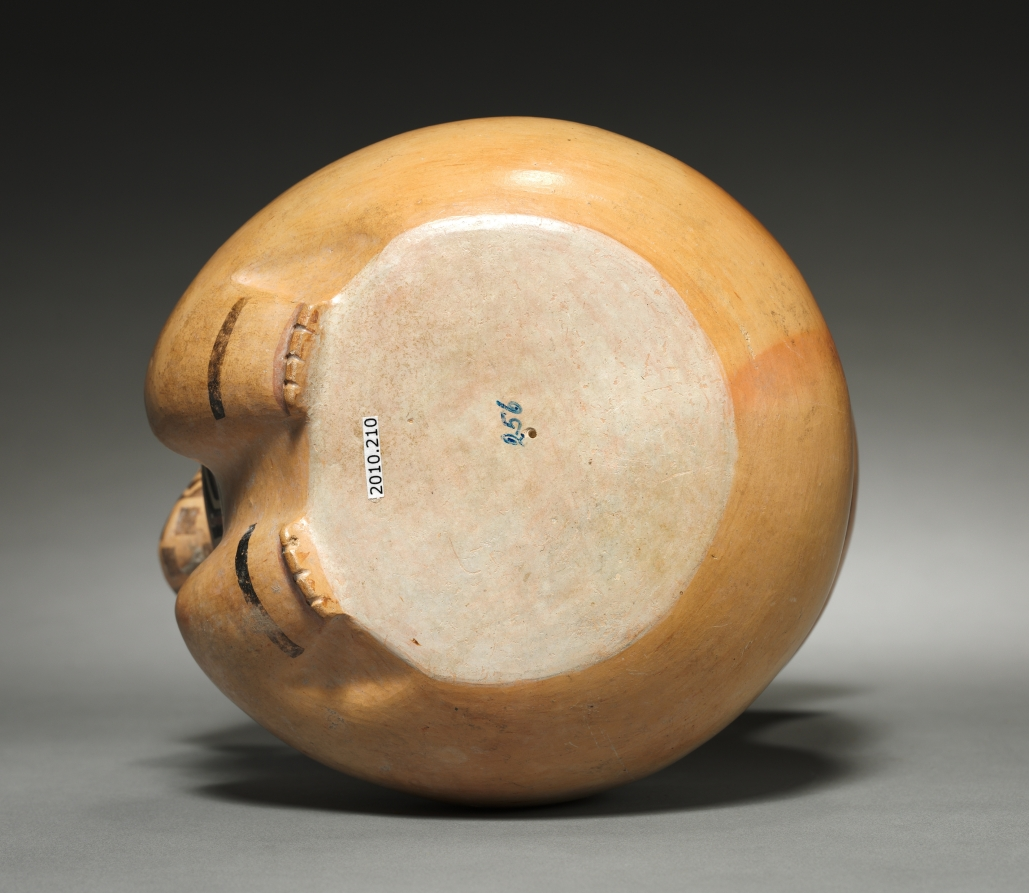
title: Mother-and-Child? Vessel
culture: Central Andes, North Highlands, Recuay people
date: 1–700 CE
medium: ceramic, slip, pigment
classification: Sculpture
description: Well-dressed, important women like this one are depicted fairly often in Recuay art. These women hold a variety of things, ranging from cups that may refer to feasts held on important political occasions to small figures commonly interpreted as children, as here. These and other representations have led scholars to suggest that Recuay women held authority independent of their male partners; their authority may have stemmed in part from involvement in feasting celebrations.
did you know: Recuay ceramics typically use only three colors: black, white, and red.